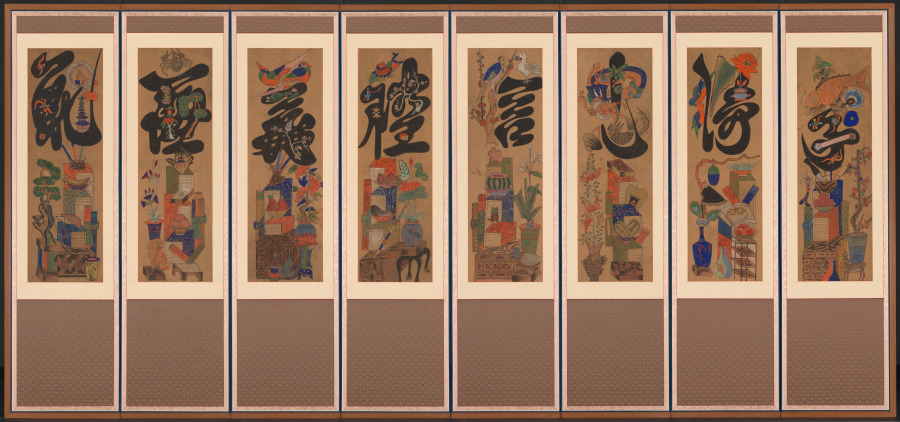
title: Munja-Chaekgeori Screen (Character-Books Screen)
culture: Korea, Joseon dynasty (1392–1910)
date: early 1900s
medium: Eight-panel folding screen, ink on paper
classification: Painting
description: This folding screen is a whimsical harmony of two different subjects: chaekgeori, or books and things; and munja, or characters. The lower section of each panel depicts the imagery of things, including books, decorative arts, and utilitarian objects. The upper portion of each panel bears a classical Chinese character. Read from far right to left, the eight characters refer to the values of Confucian teachings of the Joseon dynasty: filial piety, brotherly love, loyalty, trust, propriety, righteousness, modesty, and humility. While these two pictorial genres are harmoniously conjoined on the same picture plane, two sharply contrasting world views—urban consumerism and traditional Confucian ethics that despise materialism—compete with one another.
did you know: The eight Korean characters each mean filial piety, brotherly love, loyalty, trust, propriety, righteousness or justice, modesty or integrity, and humility or the feeling of shame.